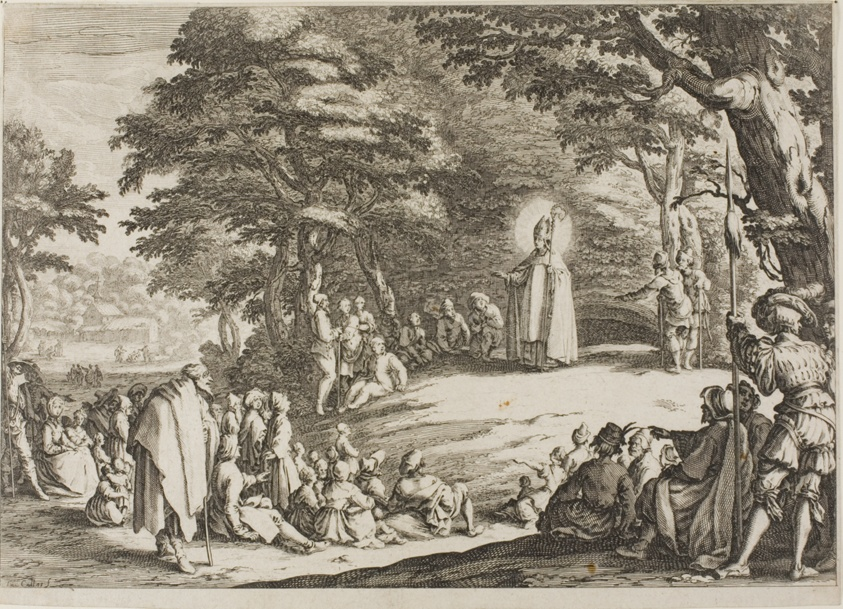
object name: Print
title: Saint Nicholas Preaching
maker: Jacques Callot (French, 1592-1635)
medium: Etching on paper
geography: France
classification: etching; print; prints and drawing